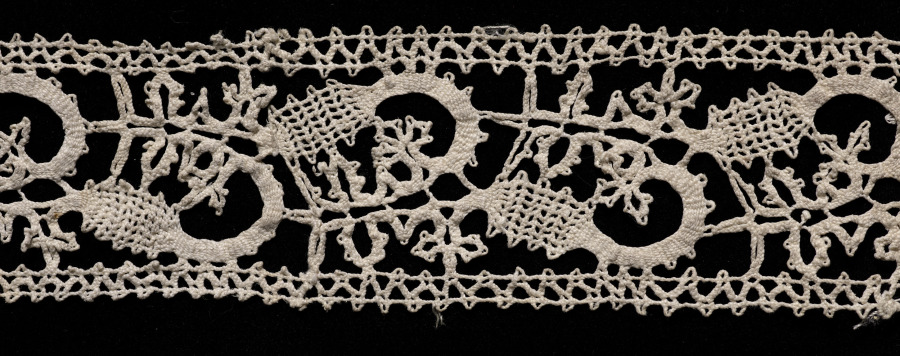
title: Lace Band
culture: Italy, Venice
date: 1600s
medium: Bobbin lace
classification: Lace